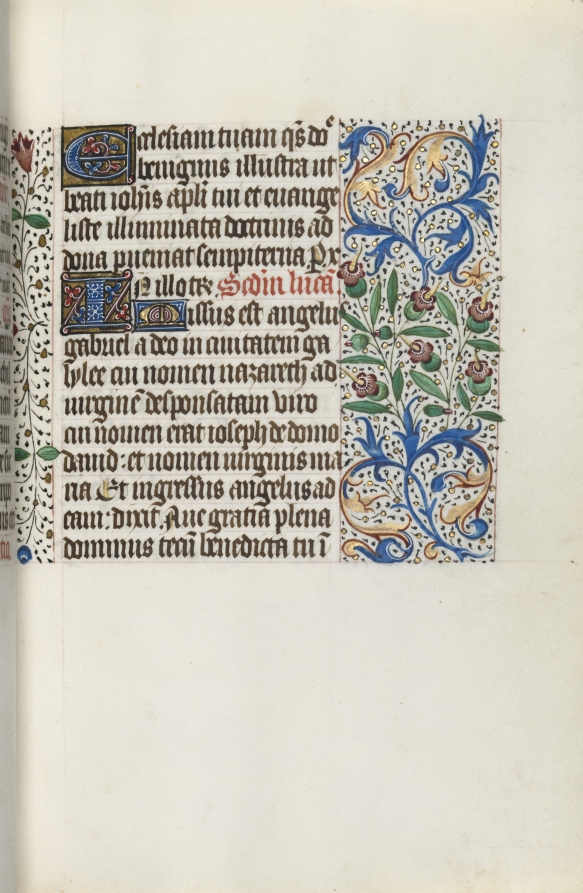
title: Book of Hours (Use of Rouen): fol. 141r, Opening of the Gospel of Luke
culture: France, Rouen, 15th century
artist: Master of the Geneva Latini (French, active Rouen, 1460–80)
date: c. 1470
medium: ink, tempera, and gold on vellum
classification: Bound Volume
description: In the late 1400s and early 1500s Rouen was an established and important center of book production. The city’s cathedral had a wealthy chapter that spent large sums of money to commission books and to maintain its extensive library. The stationers and booksellers would have likely been concentrated in or near the cathedral precinct. This artist, named after a manuscript now in Geneva, was Rouen’s principal illuminator during the second half of the 1400s.